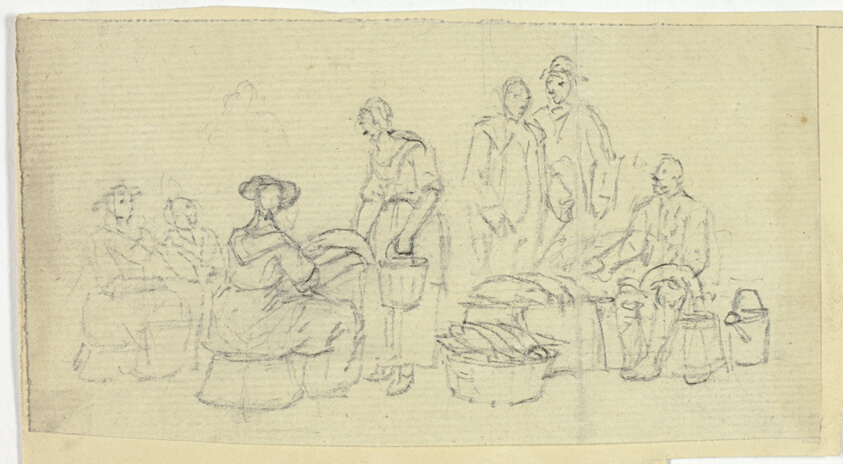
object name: Drawing and Watercolor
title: Fishmarket Scene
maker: William Henry Pyne (English, 1769-1843)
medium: Graphite on cream laid paper, tipped onto tan wove paper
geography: England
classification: graphite; drawings (visual works); prints and drawing